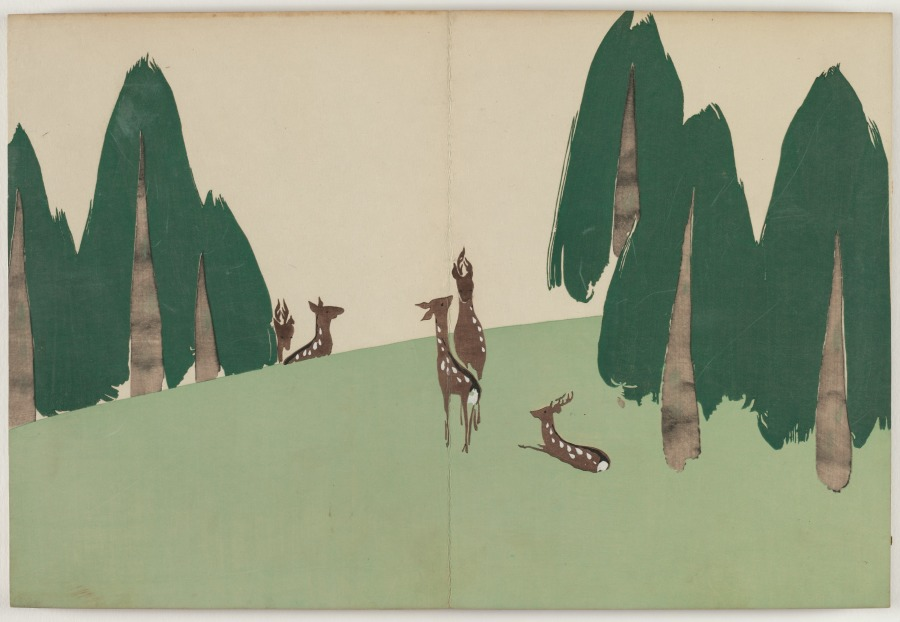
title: Flowers of a Hundred Worlds (Momoyogusa): Kasuga Plain (Kasugano)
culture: Japan, Meiji period (1868–1912)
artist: Kamisaka Sekka (Japanese, 1866–1942)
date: 1909–10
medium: color woodcuts with gold and silver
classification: Bound Volume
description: This print from a set of three woodblock printed albums displays the graphic design prowess of Kamisaka Sekka. The images were first distributed one by one to subscribers to the series but later were reissued in bound form, like this book, for mass consumers. Each print features a vignette taken from nature or Japanese literature. Many of the scenes have a long history in Japan, originating in the 900s or 1000s and having been interpreted by all manner of artists since that time. Sekka’s selections hew closely to precedents from the Rinpa style originated by painter Tawaraya Sōtatsu (c. 1570–c. 1640) and calligrapher Hon’ami Kōetsu (1558–1637).